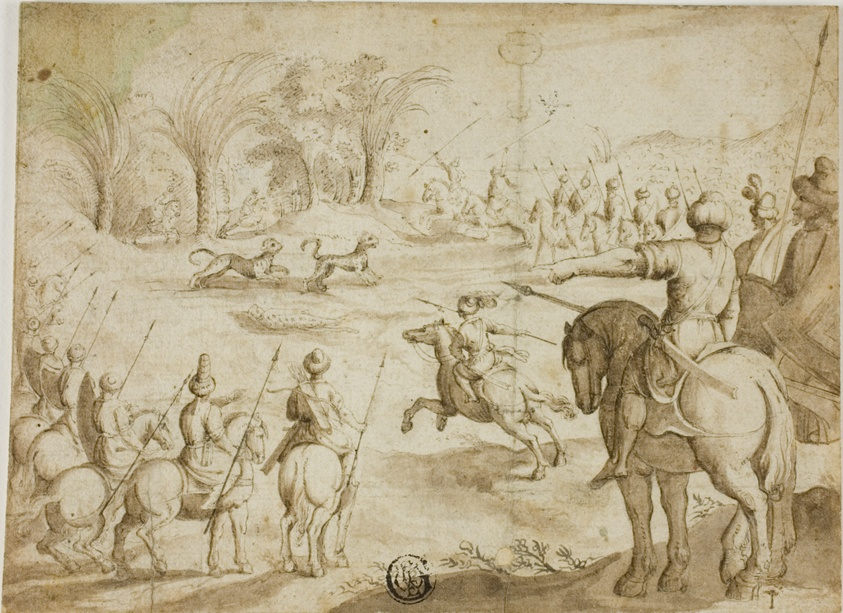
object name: Drawing and Watercolor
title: Leopard Hunt in Persia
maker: Unknown Artist; Dutch, 17th century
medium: Pen and brown ,with brush and brown wash, on ivory laid paper, laid down on ivory laid paper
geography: Netherlands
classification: pen and ink drawings; drawings (visual works); prints and drawing